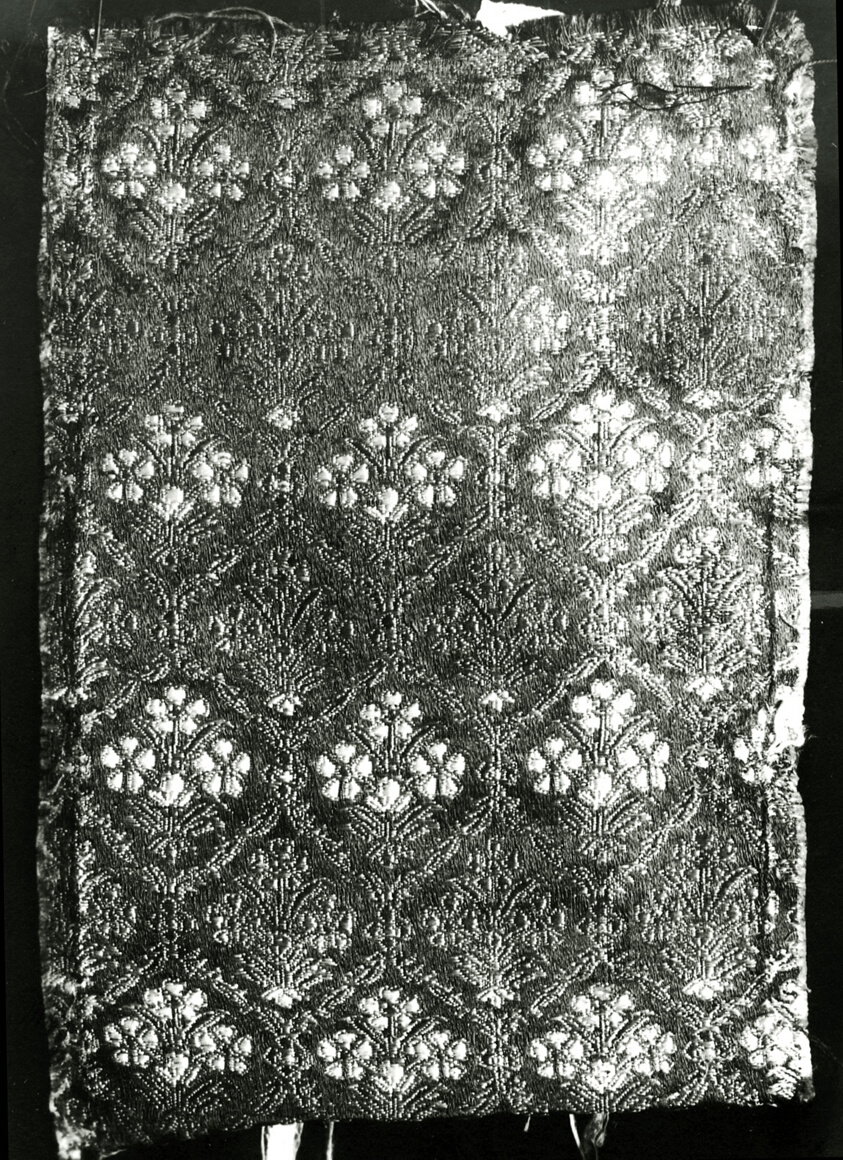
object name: Textile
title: Fragment (Dress Fabric)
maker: Iran (Persia)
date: 18th/19th century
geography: Iran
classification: textile; weaving